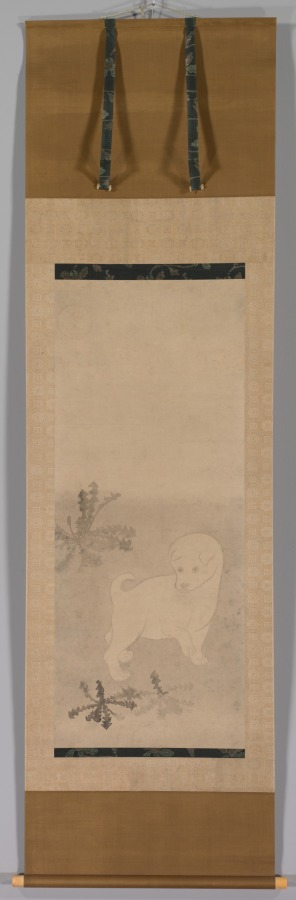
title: Puppy with Dandelions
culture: Japan, Edo period (1615–1868)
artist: studio of Tawaraya Sōtatsu (Japanese, c. 1570–c. 1640)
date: 1600–1640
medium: hanging scroll; ink on paper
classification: Painting